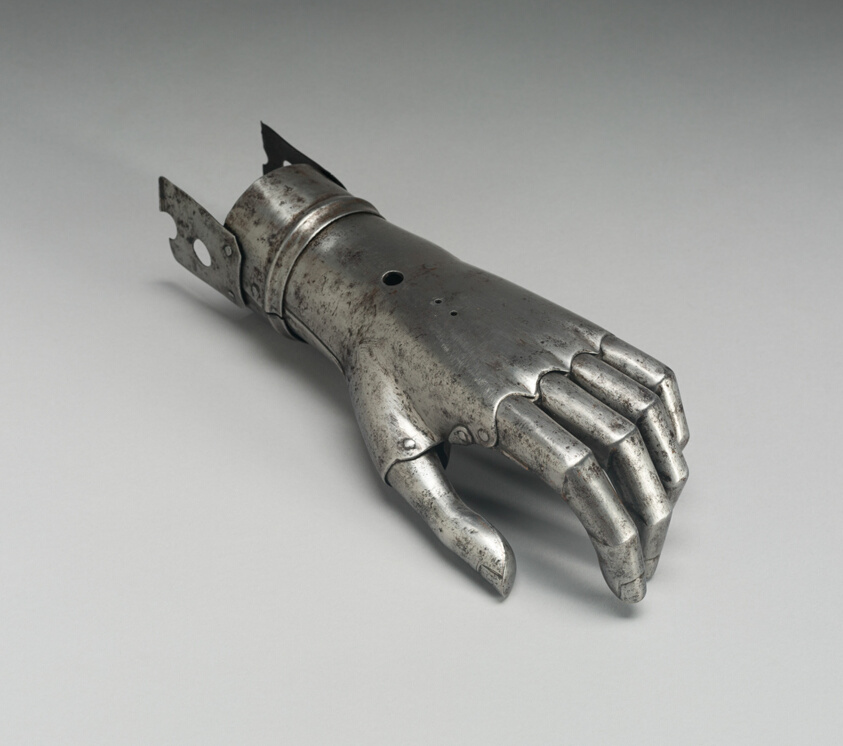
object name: Armor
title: Left Hand Prosthetic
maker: European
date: late 16th century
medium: Steel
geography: Europe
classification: arms and armor, miscellaneous; arms and armor; armor